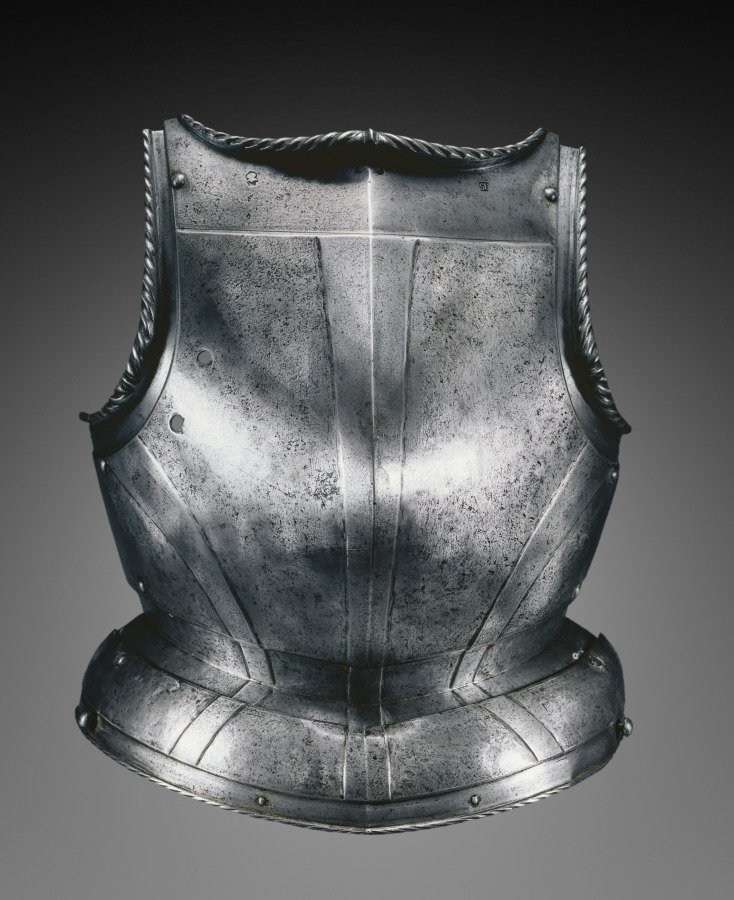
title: Breastplate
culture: Germany, Landshut, mid-16th century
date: mid-1500s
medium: steel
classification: Arms and Armor